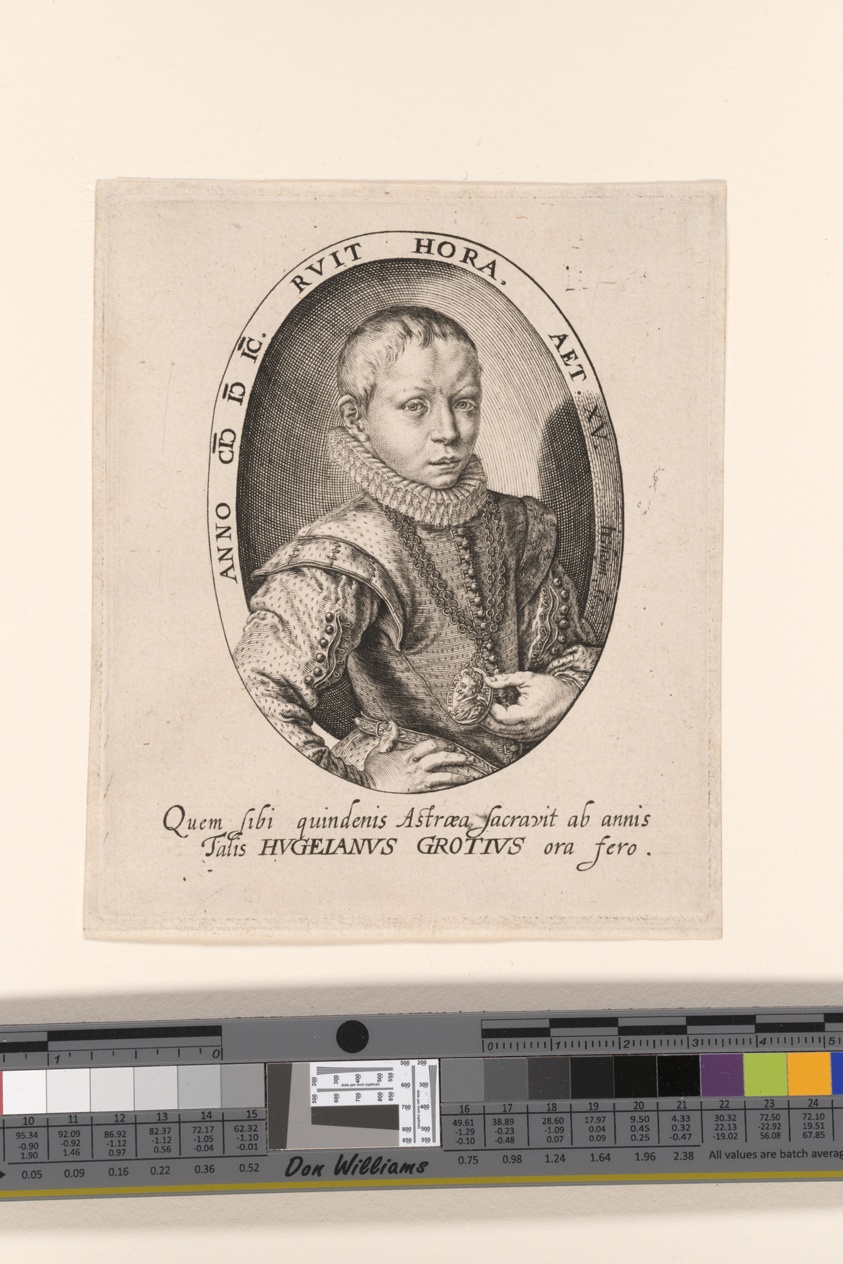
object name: Print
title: Hugo Grotius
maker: Jacques de Gheyn II; Dutch, 1565–1629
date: 1599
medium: Engraving on paper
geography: Netherlands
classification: engraving; paper; print; prints and drawing